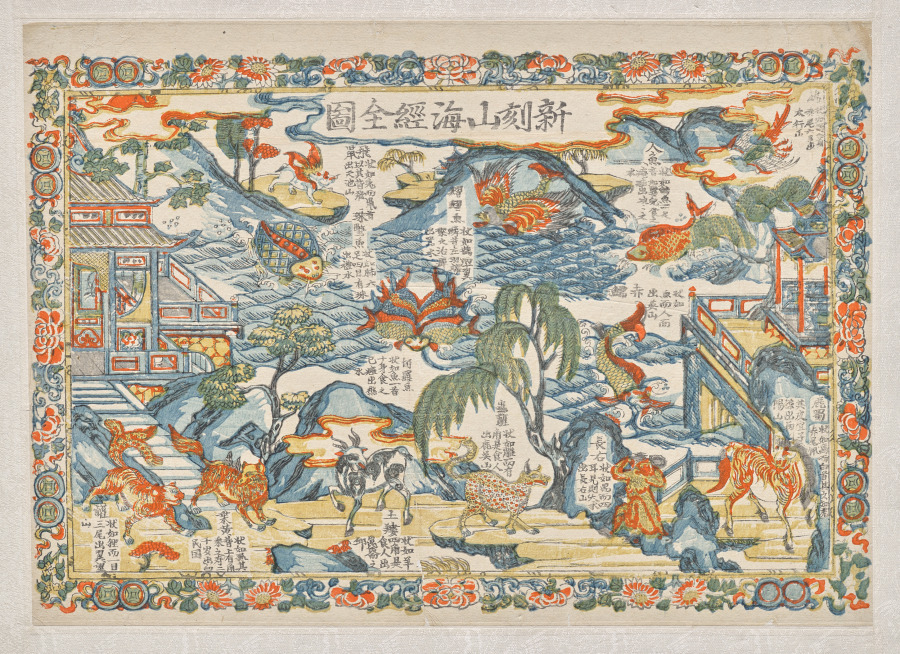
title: A Newly-Cut Print of Illustrations from The Classic of Mountains and Seas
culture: China, Qing dynasty (1644–1911), Jiaqing period (1796–1820)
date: 1796–1820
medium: Polychrome woodblock print; ink and color on paper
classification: Print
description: In the 1600s, printing flourished in such Jiangnan cities as Nanjing, Suzhou, Hangzhou, and Huizhou, evolving from privately enjoyed illustrated books printed in color to more commercialized single-sheet color prints that were hung on walls and became part of the rich urban visual culture.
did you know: Woodblock printing in color reached a height in China in the 1600s to 1700s. The prints were executed by means of sets of separate blocks, each carved to print a different color.